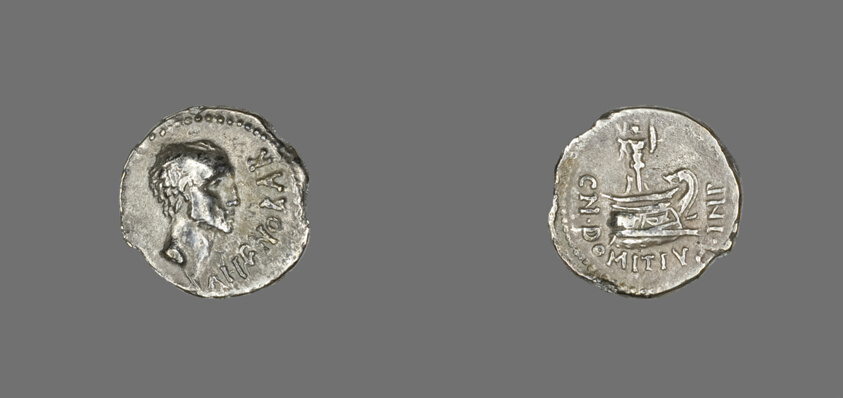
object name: Coin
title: Denarius (Coin) Portraying Ahenobarbus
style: roman (ancient, style or period), ancient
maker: Roman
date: 41 BCE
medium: Silver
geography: Roman Empire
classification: coin; ancient art